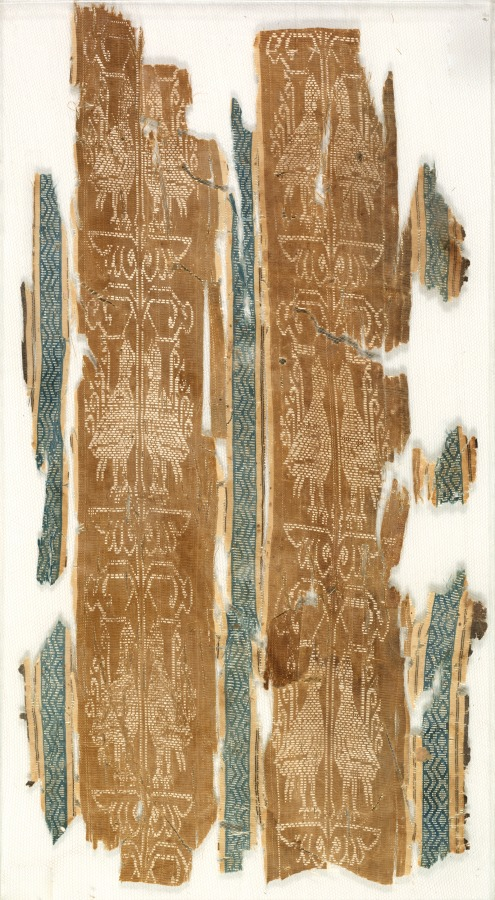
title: Silk fragment with striped pattern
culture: Syria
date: 900s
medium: plain weave variation with supplementary weft: silk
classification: Textile